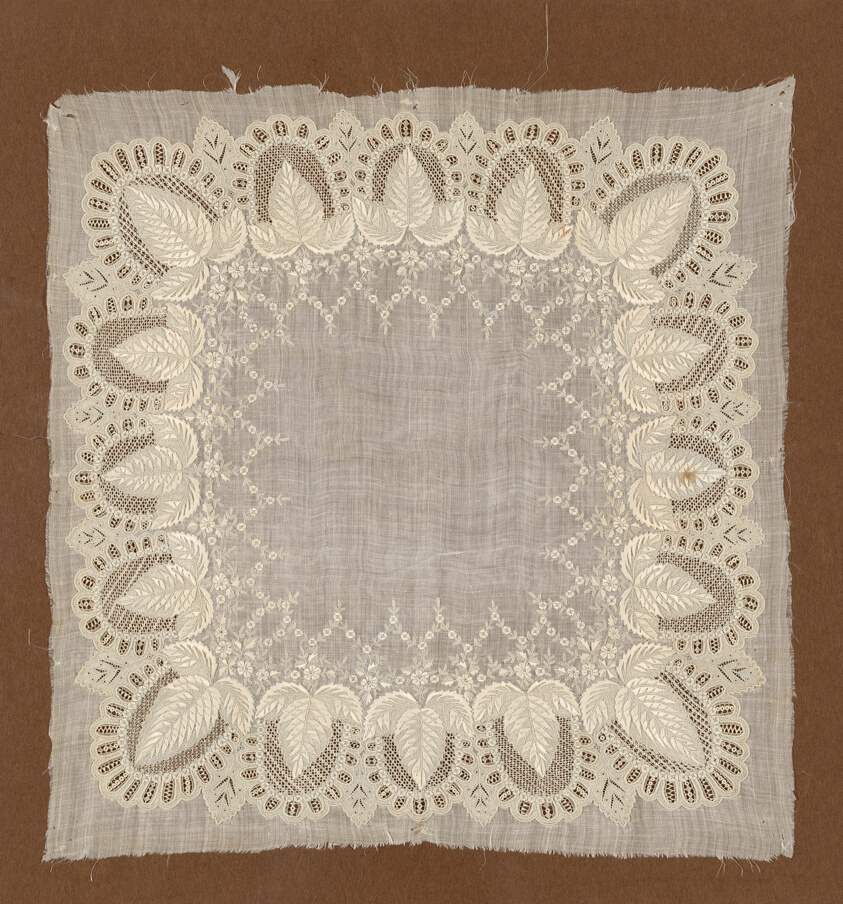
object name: Textile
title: Handkerchief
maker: France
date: 19th century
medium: Linen, plain weave; embroidered with linen threads in padded satin, overcast, eyelet, buttonhole and hem stitches and back stitch known as Point de Sablé; openwork with drawn filling and overcast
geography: France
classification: textile; needlework (visual works); accessories (object genre); weaving